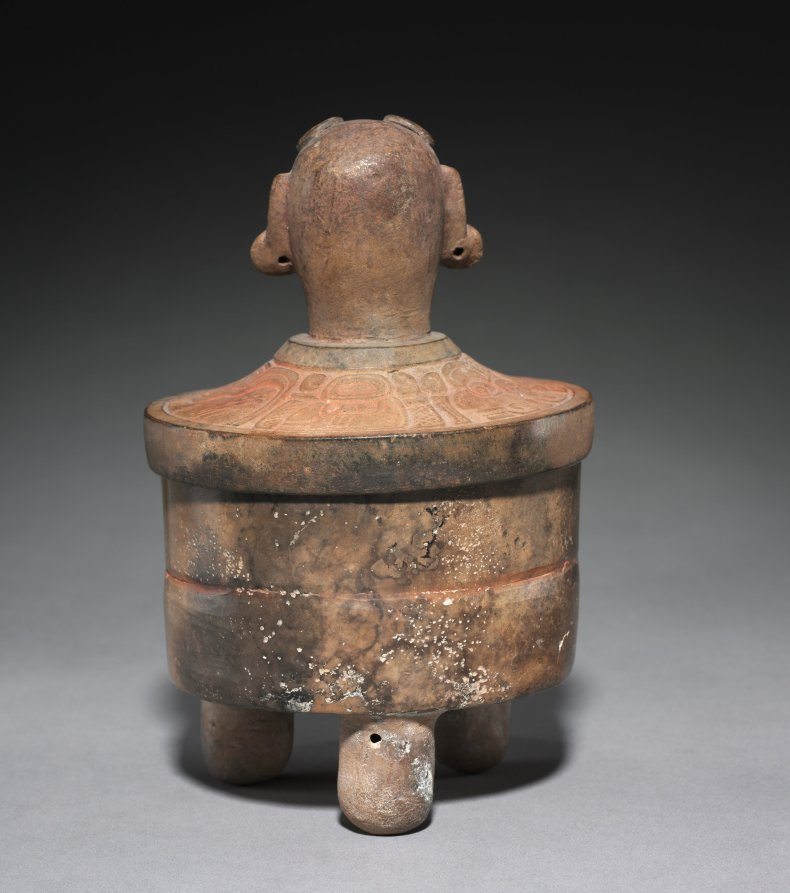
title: Tripod Vessel with Lid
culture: Mexico or Central America, Maya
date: 250–600 CE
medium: earthenware with pigment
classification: Ceramic